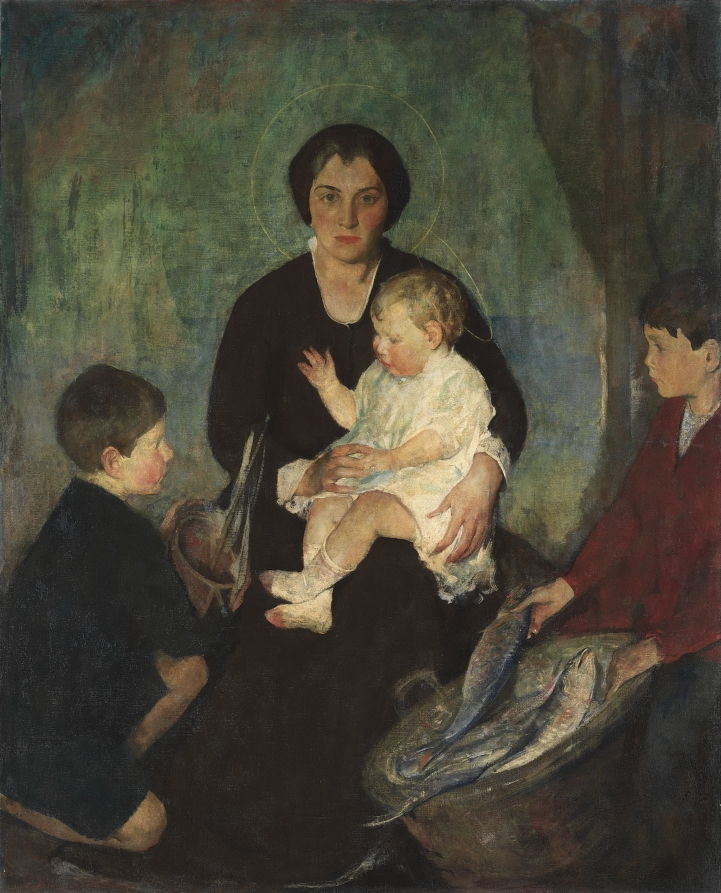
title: The Offering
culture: America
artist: Charles W. Hawthorne (American, 1872–1930)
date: c. 1915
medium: oil on canvas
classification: Painting